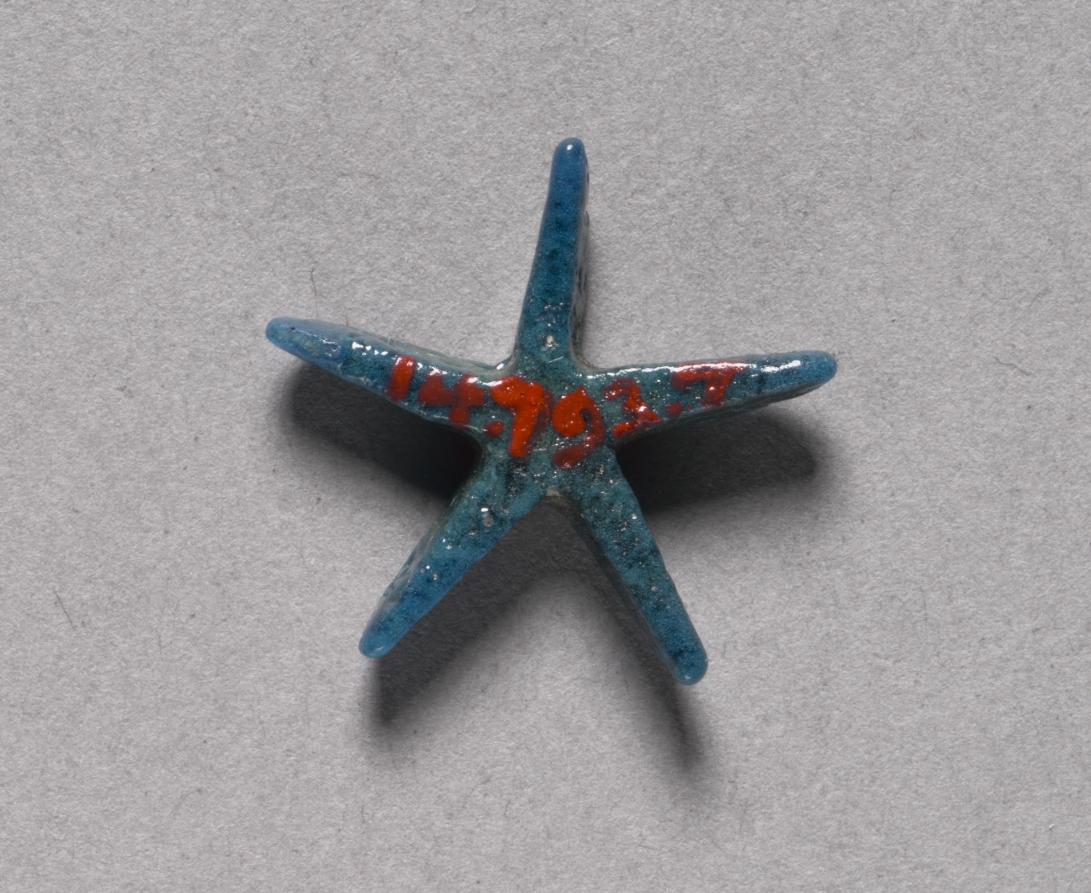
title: Amulet of a Star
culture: Egypt, Middle Kingdom (2040–1648 BCE), Dynasty 12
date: 1980–1801 BCE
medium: deep turquoise green faience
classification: Amulets